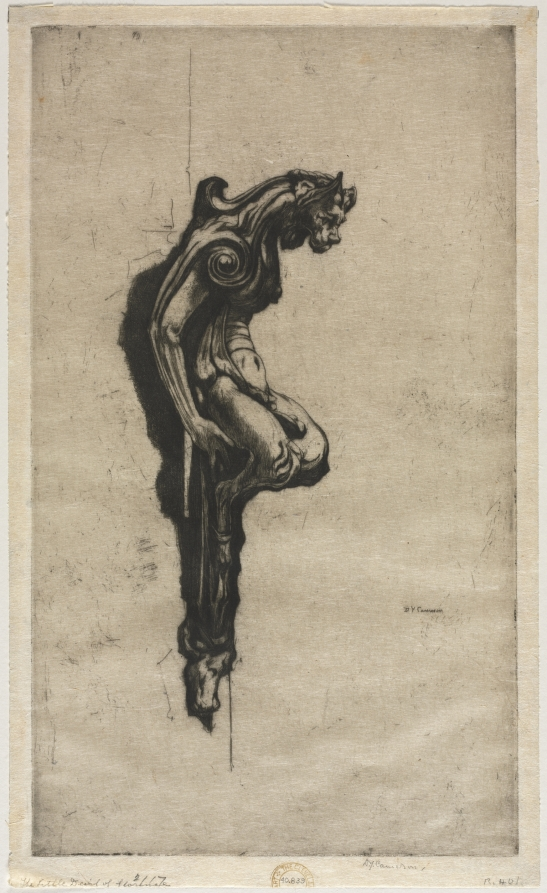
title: The Little Devil of Florence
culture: England, 20th century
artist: David Young Cameron (British, 1865–1945)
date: 1907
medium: etching and drypoint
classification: Print